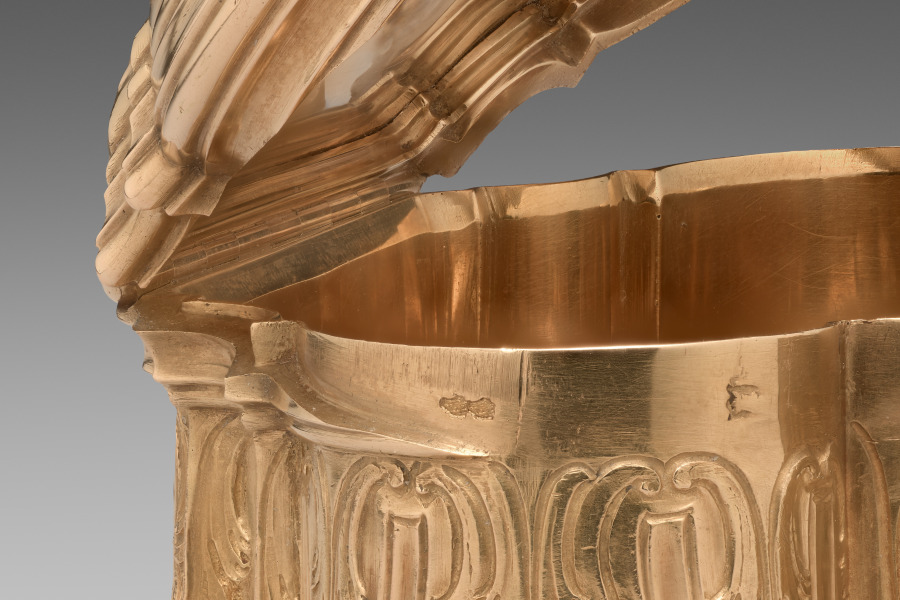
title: Gold Box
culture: France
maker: Juste-Aurèle Meissonnier (French, 1695–1750)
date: 1728–29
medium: gold and lapis lazuli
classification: Metalwork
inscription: IOM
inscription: a crowned M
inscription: a crowned dolphin's head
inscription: a crowned chancellor's mace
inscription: double frame eagle's head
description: With its central cartouche, heavy molding, and fluted sides, the design of this box attests to Juste-Aurèle Meissonnier’s interest in architecture. The box is further distinguished by a strong sense of movement, achieved through its dynamic contour, extraordinary level of detail, and the dramatic contrast between gold and lapis lazuli. Such small boxes, known as snuffboxes, were used to hold scented powdered tobacco that was inhaled through the nostrils. Made of precious materials and highly ornamented, they conveyed the owner’s wealth, fashion awareness, sophistication, and social standing. These personal, collectible items were often presented as luxurious gifts. This box was made for the dowager Queen of Spain, Maria Anna of Neuburg, whose coat of arms – along with that of her late husband, Charles II – features on the cover.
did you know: This is one of the two known objects that bear the maker's mark of Meissonnier.